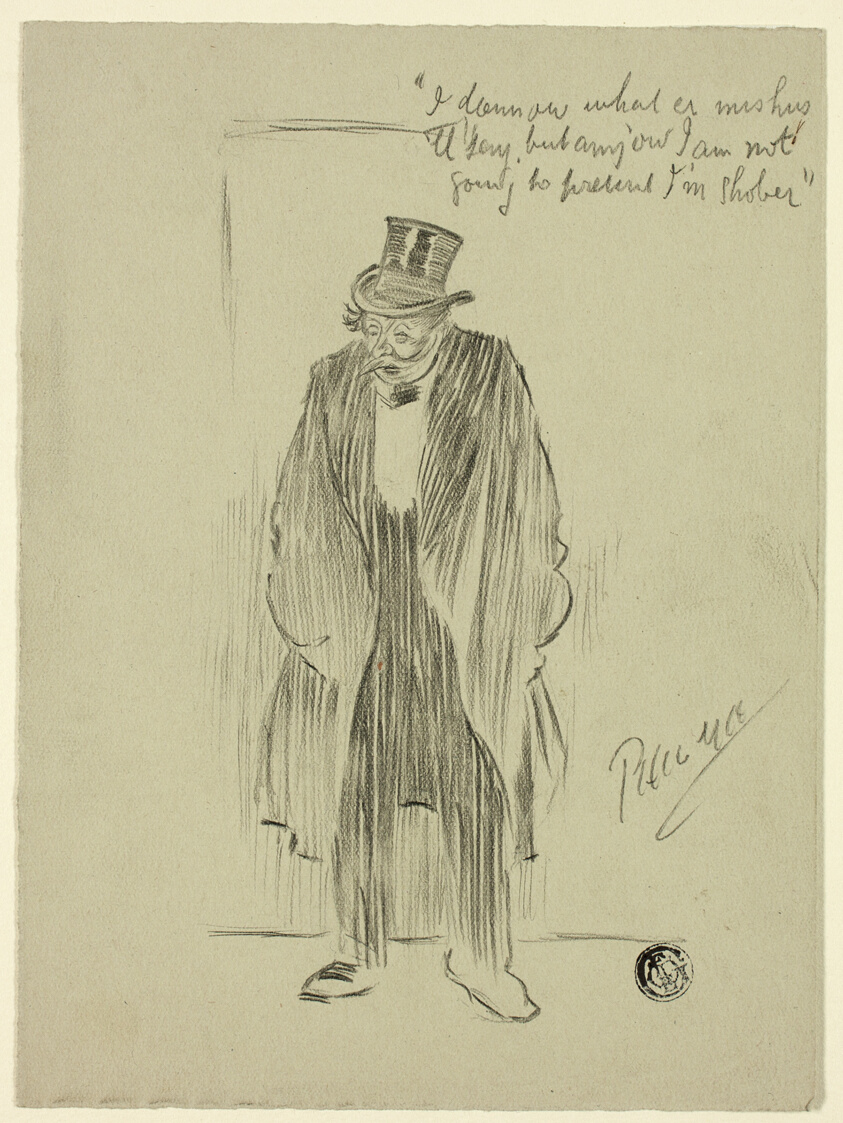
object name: Drawing and Watercolor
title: The Modern Troubadour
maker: Philipp William May; English, 1864-1903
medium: Black crayon and graphite on gray wove paper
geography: England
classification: crayon; drawings (visual works); prints and drawing